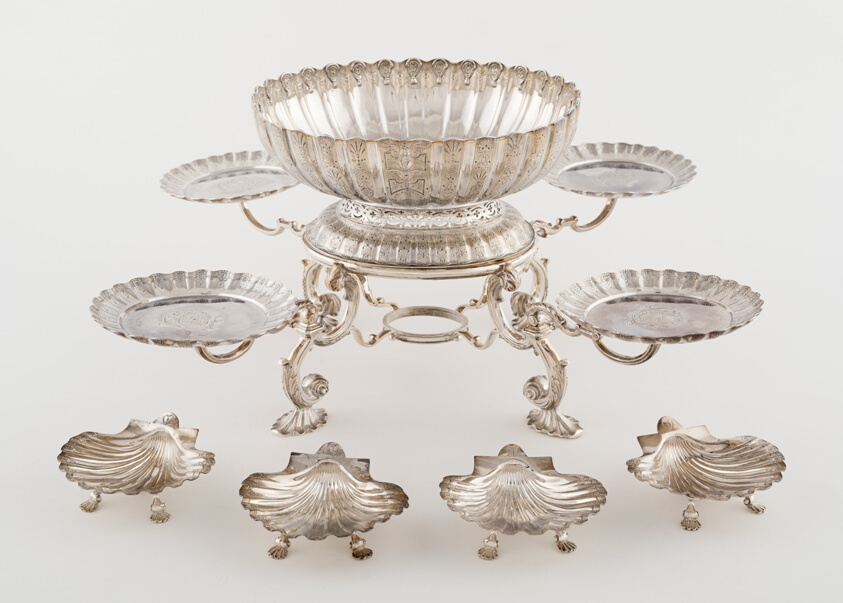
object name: Metalwork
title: Epergne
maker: Eliza Godfrey; English, active 1731-1758; London, England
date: 1755/56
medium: Silver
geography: London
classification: silver; metalwork; european decorative arts